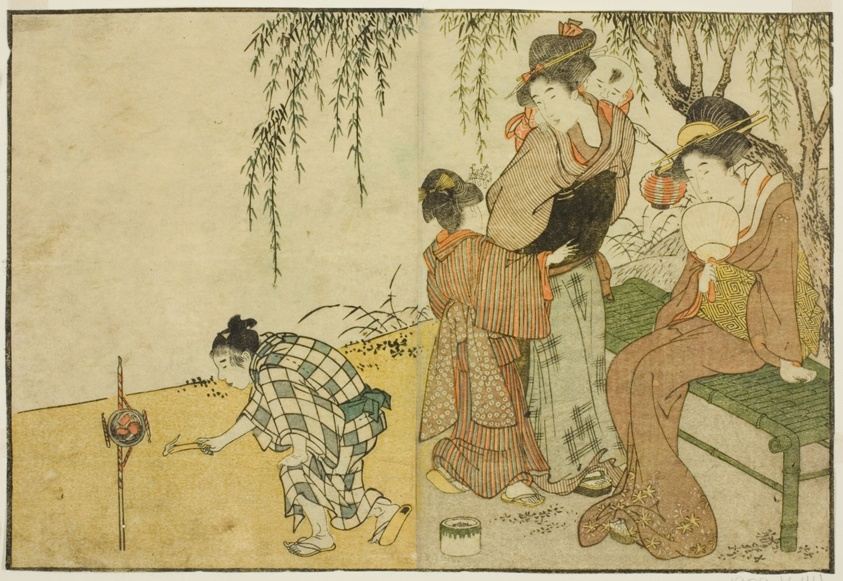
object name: Print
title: Enjoying Fireworks, from the illustrated book "Picture Book: Flowers of the Four Seasons (Ehon shiki no hana)," vol. 1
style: Japanese (culture or style)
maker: Kitagawa Utamaro 喜多川 歌麿; Japanese, 1753 (?)-1806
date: New Year, 1801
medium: Color woodblock print; double-page illustration from book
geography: Japan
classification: print; asian art